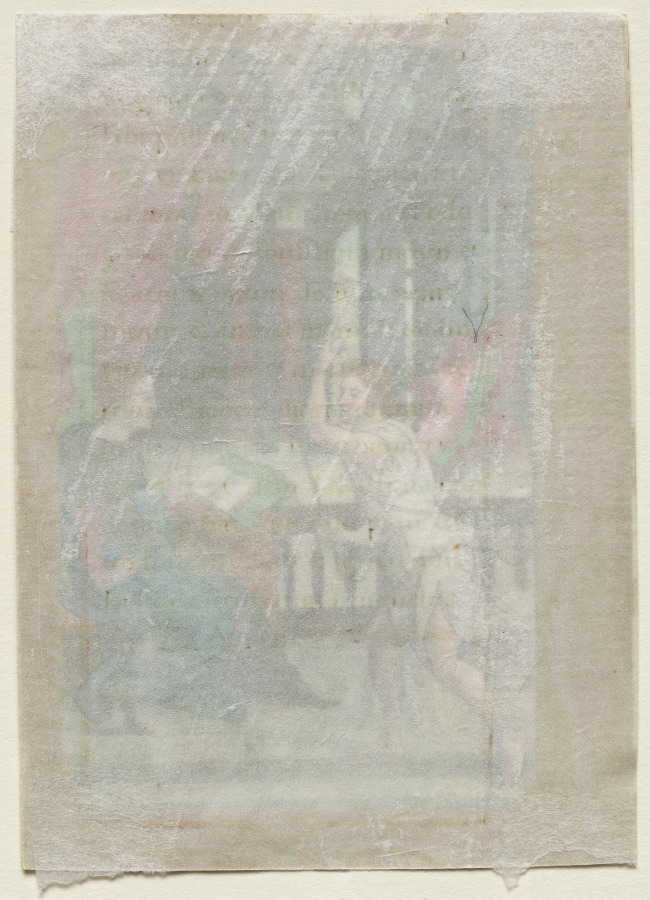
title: The Annunciation (Matins, Office of the Virgin): Leaf from a Book of Hours (1 of 3 Excised Leaves)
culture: France, Paris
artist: Noël Bellemare (French, d. 1546)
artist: and The 1520s Hours Workshop (French)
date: c. 1530–35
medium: ink, tempera, and liquid gold on vellum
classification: Manuscript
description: Unusual in French manuscript painting of the period, fuchsia pinks and bright acid greens characterize the painting’s palette. The figures are set in the foreground of the miniature and enclosed within a "Fontainebleau"-style architectural frame. The 1520s Hours Workshop primarily produced jewel-like luxury books of hours for a wealthy clientele. Evidence points to Paris as the site of the workshop's activity under the direction of the Antwerp-born miniaturist Noël Bellemare (died 1546).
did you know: Books of hours were often purchased as luxury objects in order to reflect the owner’s status, wealth, and taste.